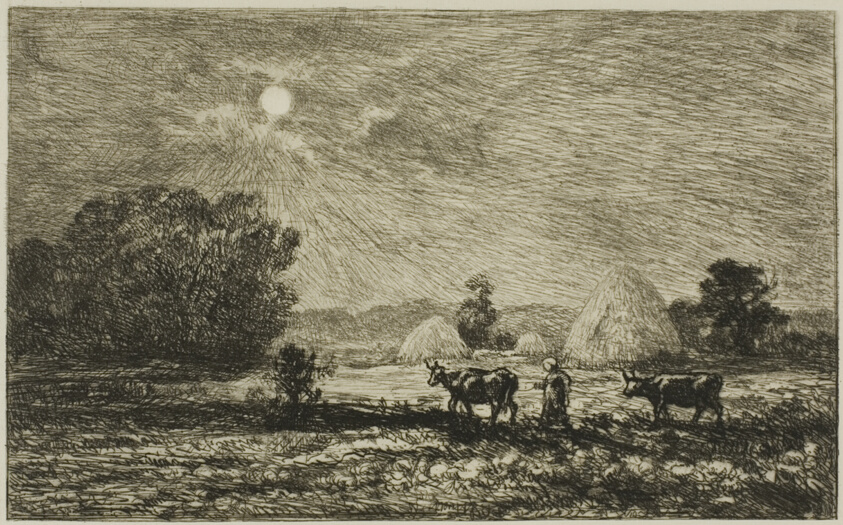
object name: Print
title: Moonlight at Valmondois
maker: Charles François Daubigny (French, 1817-1878)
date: 1877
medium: Etching and drypoint on ivory Japanese paper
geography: France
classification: etching; print; prints and drawing